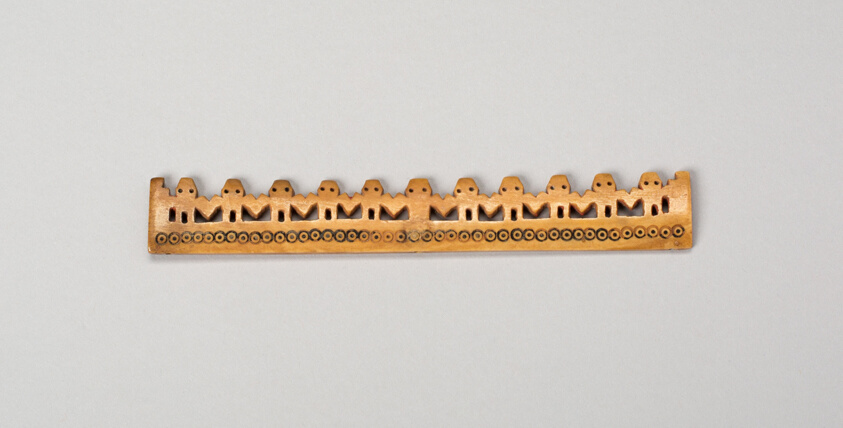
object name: Decorative Arts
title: Balance-Beam Scale with Row of Cut-Out Figures and Incised Circles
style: nazca, early intermediate period, Pre-Columbian, americas, Arts of the Americas, andean, andes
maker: Possibly Nazca; South coast, Peru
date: 500–800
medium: Bone with pigment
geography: Peru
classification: bone; american decorative arts; tool; decorative arts; art of the americas